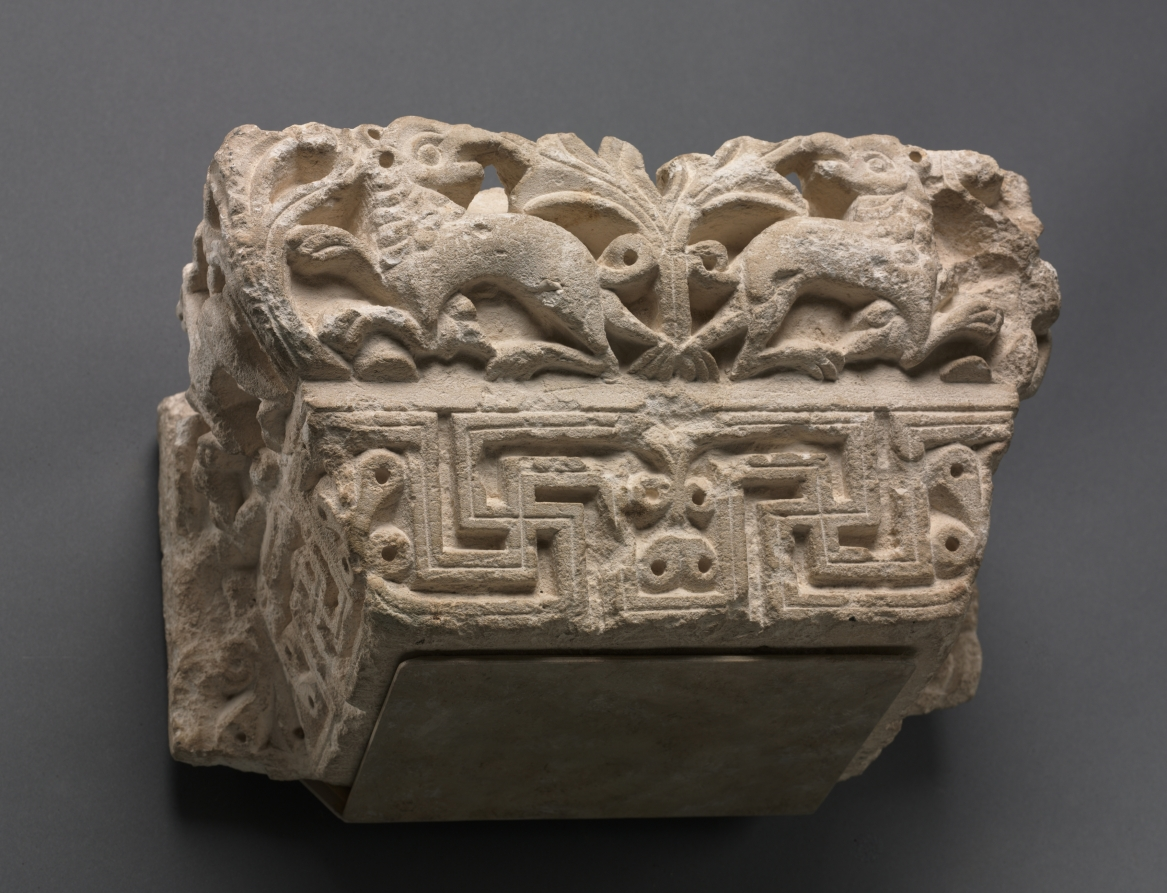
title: Engaged Capital with Animals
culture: Egypt, Coptic period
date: 400s - 500s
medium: limestone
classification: Sculpture